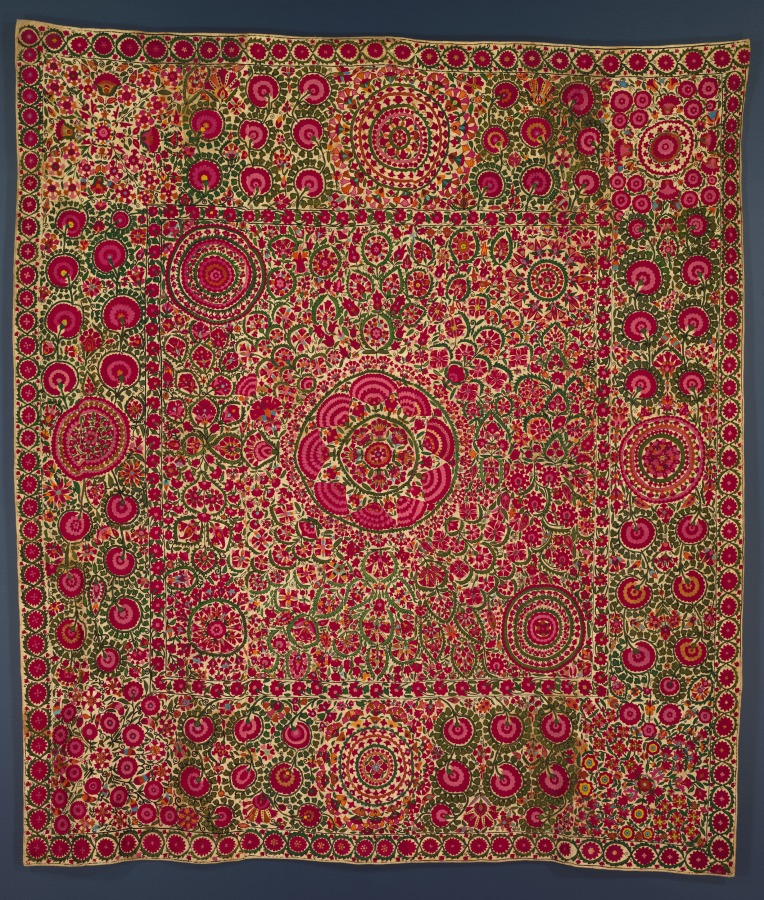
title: Curtain or bedcover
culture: Tajikistan, Ura Tube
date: early 1800s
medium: plain weave: cotton; embroidery: silk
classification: Embroidery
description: Known as suzani, embroideries with elaborate floral decoration from Central Asia were a significant part of a bride’s dowry and were ceremoniously displayed on special occasions. Women embroidered suzani, mothers passing their skills on to their daughters. Floral and foliate motifs generally dominate, emboldened with several shades of red and multiple borders, perhaps conveying cosmological, medicinal, or fertility associations. However, few display a more bountiful blossoming garden than seen here. Flora radiates from the central fanlike bouquet, a design echoed in the corners of the field and in the wide border, characteristic of work from Bukhara, Uzbekistan. Patterns were drawn on several loosely joined cotton cloths and then embroidered in chain stitch.